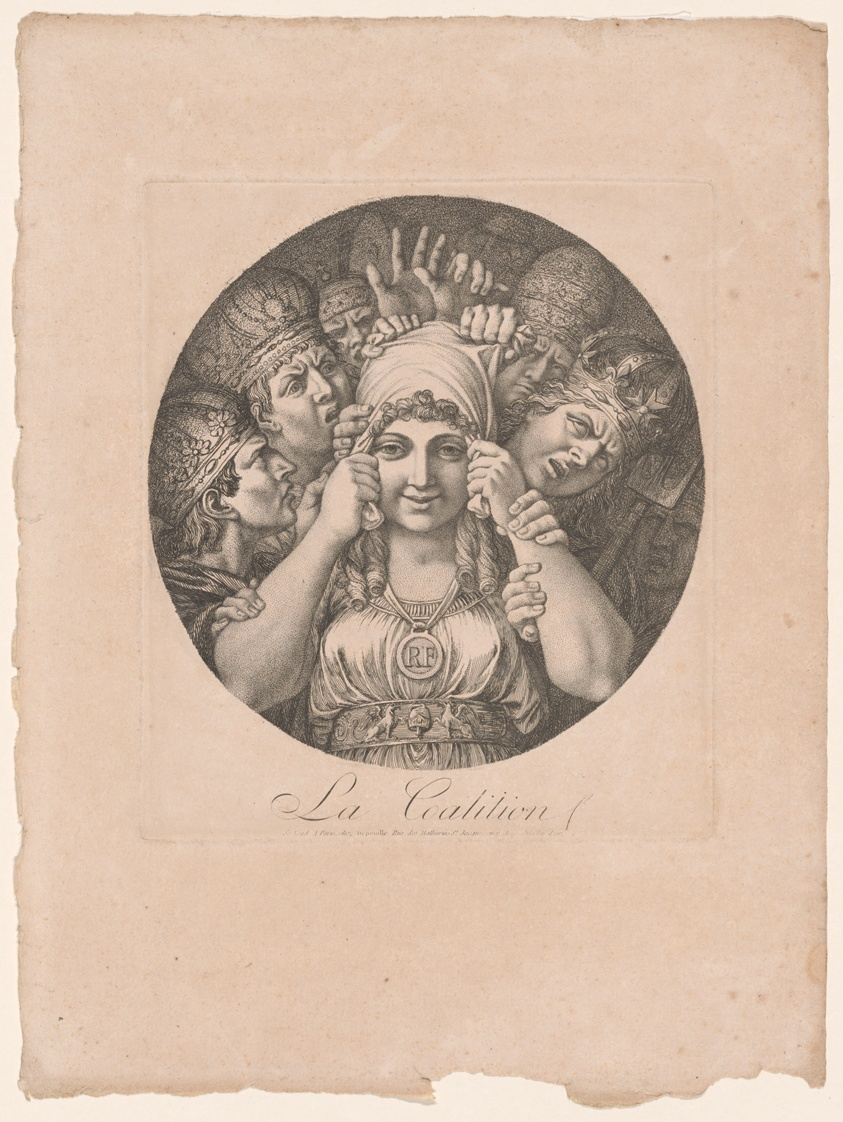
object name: Print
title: The Coalition (La Coalition)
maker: Esprit-Antoine Gibelin (French, 1739-1813)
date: 1795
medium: Etching and engraving in black on tan laid paper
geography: France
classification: prints and drawing; engraving; etching; paper; print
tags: French Revolution, France, revolutionaries, political satire, satire